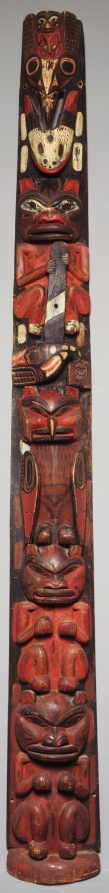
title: Totem Pole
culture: Northwest Coast, Tlingit, 19th century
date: c. 1880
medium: carved and painted wood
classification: Sculpture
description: Native American villages of the Pacific Northwest were marked by great totem poles that proclaimed the rank and ancestry of their owners. This small model pole was once owned by a Tlingit storyteller, a member of the coho salmon clan, of the raven tribe. Because the pole has been stored indoors, its carving and bright, original colors are undamaged by the elements. Reportedly, this totem pole illustrates several stories. Kushda-Kaw, the land-otter, is the pole's lowermost figure; above him is his wife. The wife transforms herself into an owl (the third figure from the bottom) and flies into the trees to keep watch. Kushda-Kaw then lies in wait to frighten and harass unwary passers-by. Above the owl is a finback whale carrying a friend out to sea for fishing. Near the top of the pole is a whale with red lips who has swallowed his enemy, the raven. The tiny figure at the pole's summit is a spirit-woman, the raven's lover. She will cut the whale open to rescue him.